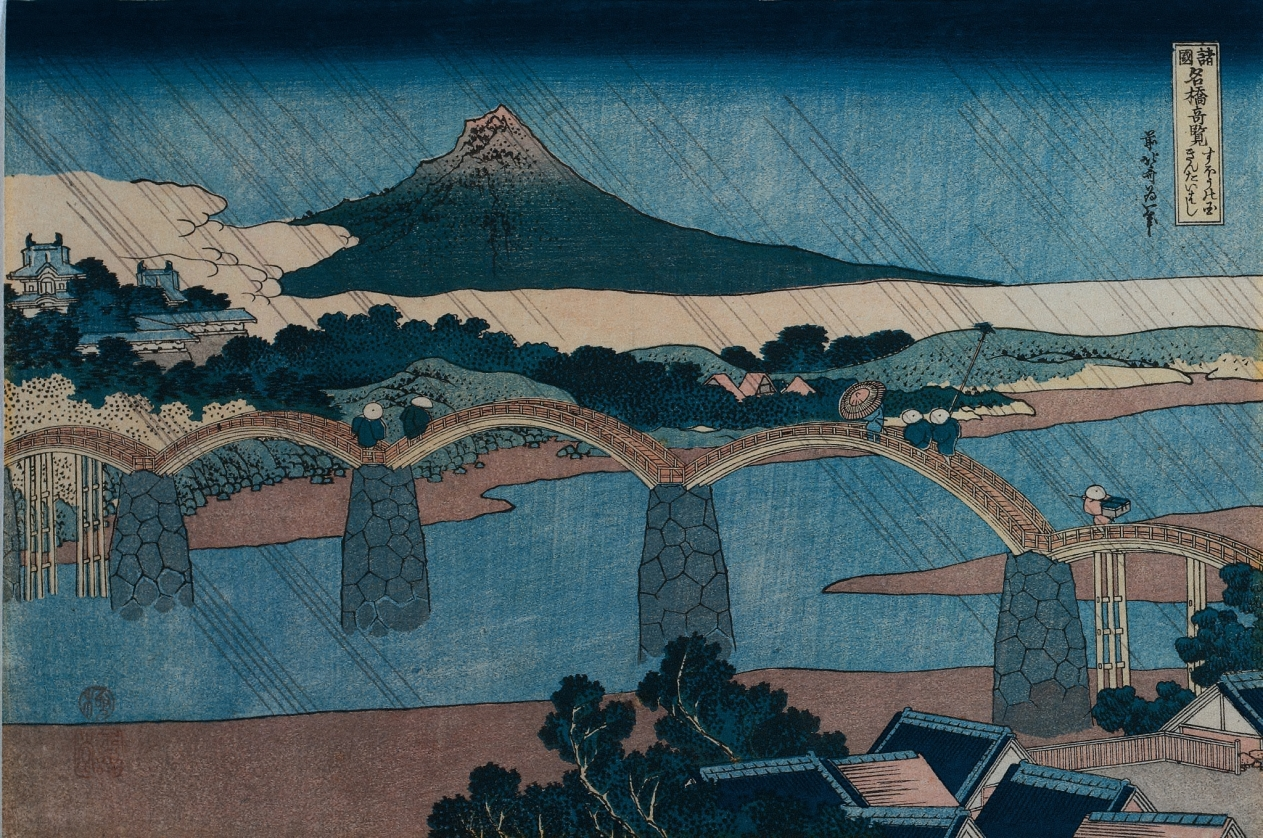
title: The Brocade Bridge in Suo Province (from the series Curious Views of Famous Bridges in the Provinces)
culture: Japan, Edo period (1615–1868)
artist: Katsushika Hokusai (Japanese, 1760–1849)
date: early 1830s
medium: color woodblock print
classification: Print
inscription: Signature: Zen Hokusai Iitsu hitsu Publisher: Nishimuraya Yohachi (Eijudo)